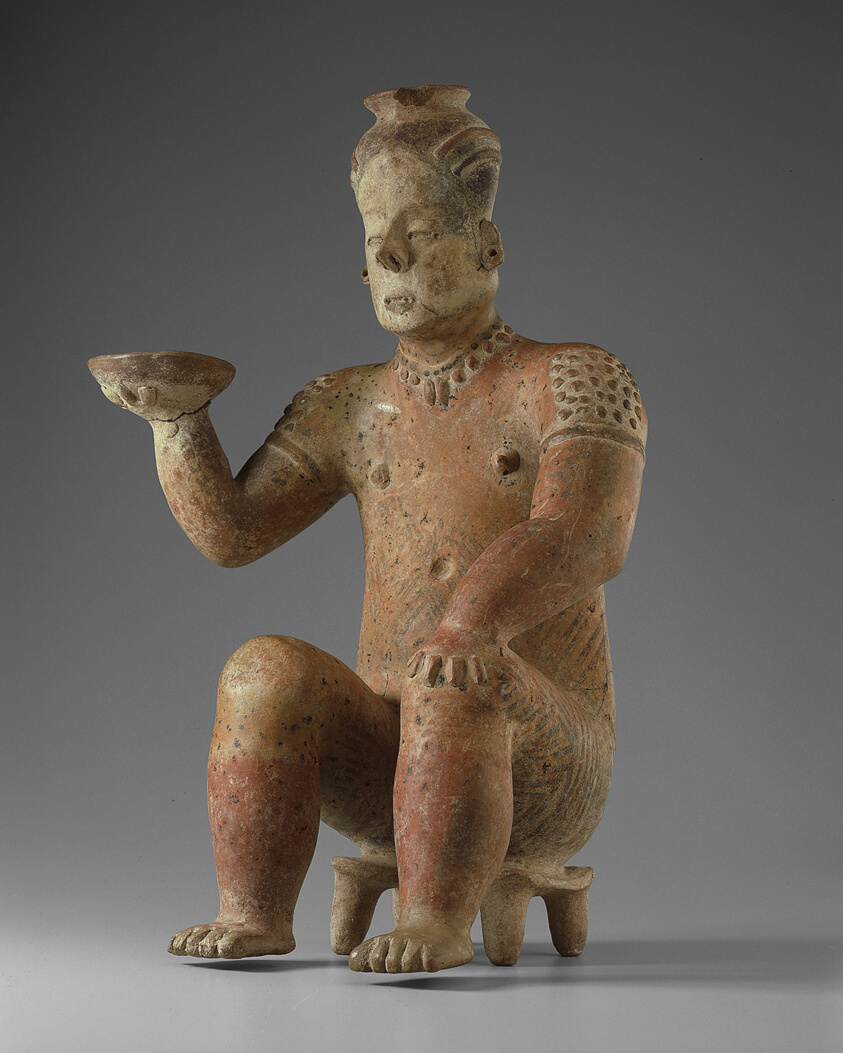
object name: Sculpture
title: Seated Female Figure Holding a Bowl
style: colima, mesoamerican, Pre-Columbian, americas, west mexico, Arts of the Americas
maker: Colima (Colima, Mexico)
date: 100–800 CE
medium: Ceramic and pigment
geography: Western Mexico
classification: earthenware; ceramics; sculpture; art of the americas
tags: people, female, offering, ancestors